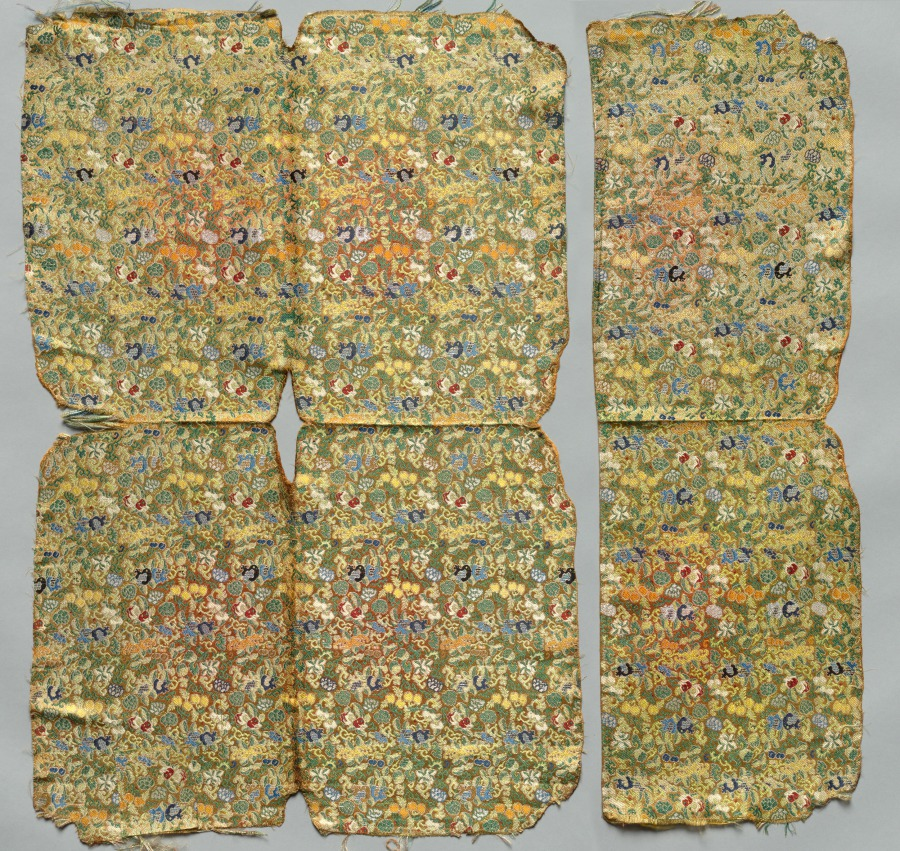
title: Fragments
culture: China, Qing dynasty (1644-1911)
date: 1800s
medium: Silk; damask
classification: Textile